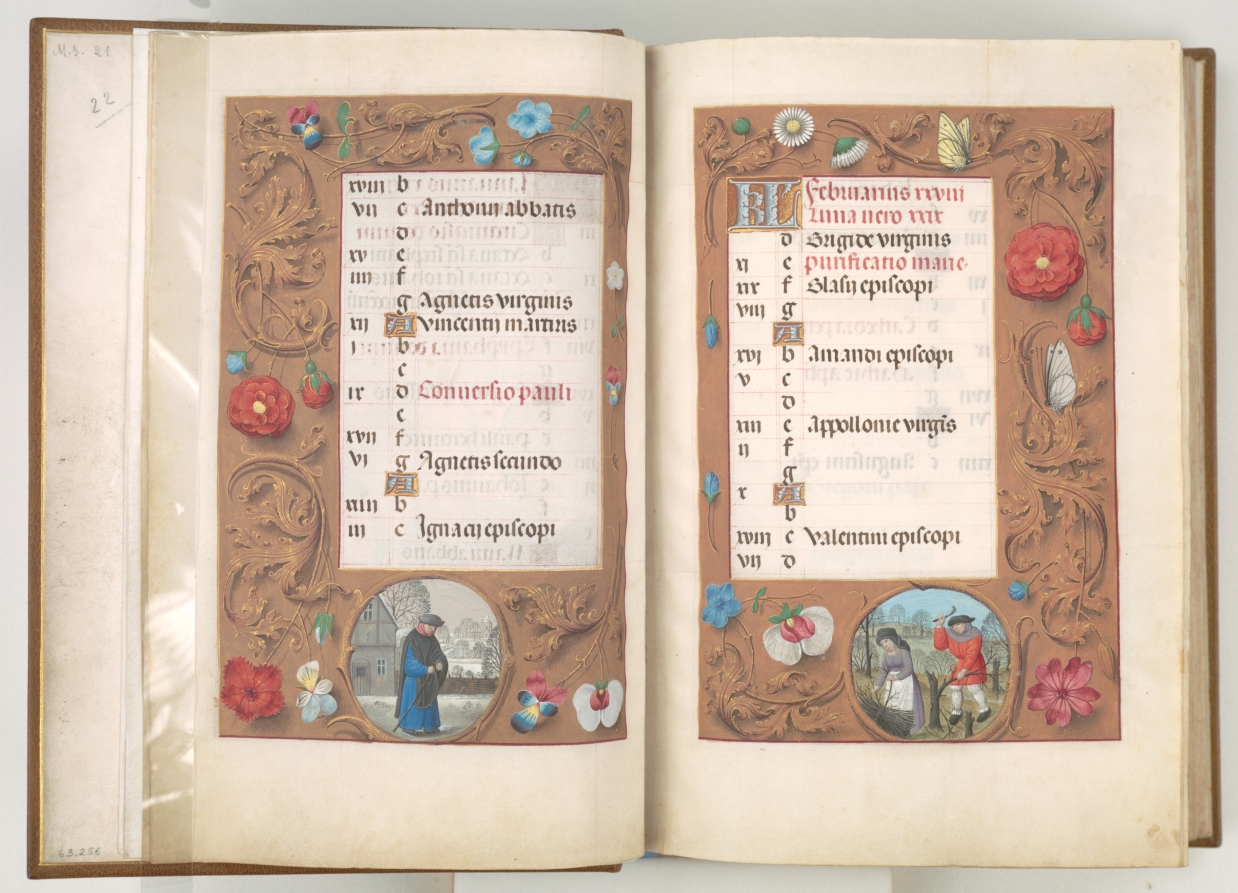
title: Hours of Queen Isabella the Catholic, Queen of Spain: Fol. 3r, February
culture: Flanders, Ghent and Bruges, late 15th century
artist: Master of the First Prayerbook of Maximillian (Flemish, c. 1444–1519)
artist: and Associates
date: c. 1500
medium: ink, tempera, and gold on vellum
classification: Bound Volume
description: This manuscript was illuminated by a circle of at least five highly organized manuscript painters active in the Flemish cities of Ghent and Bruges. The principal illuminator was Alexander Bening, who painted the majority of the book's miniatures. Manuscripts produced by this circle of artists are renowned for the decoration of their borders, which typically feature a rich variety of realistically painted flowers, birds, and butterflies. This prayer book, called a book of hours, was intended not for a cleric but for the private devotions of a lay person—in this case, Isabella the Catholic, Queen of Spain (1451–1504); her coat of arms embellishes the book's frontispiece. It is unlikely that the book was commissioned by the Queen herself; rather, she probably received it as a diplomatic gift from someone courting her patronage, perhaps Cardinal Francisco Jimenez de Cisneros. A Franciscan friar, Jimenez was dependent upon Isabella for his advancement, first to the post of Queen's confessor in 1492, and then to Archbishop of Toledo in 1495.